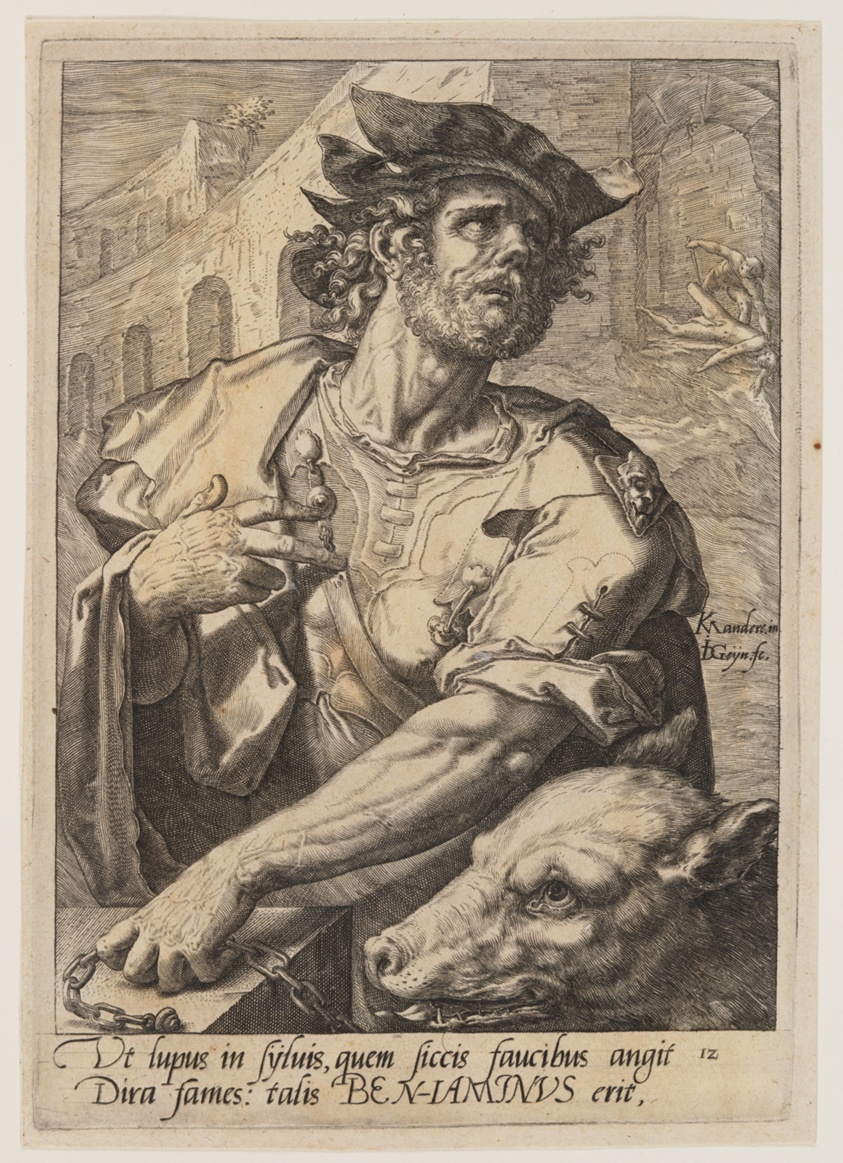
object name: Print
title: Benjamin, from The Twelve Sons of Jacob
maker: Jacques de Gheyn II (Dutch, 1565–1629); after Karel van Mander (Dutch, 1548–1606)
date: c. 1589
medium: Engraving on ivory laid paper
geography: Netherlands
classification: engraving; paper; print; prints and drawing